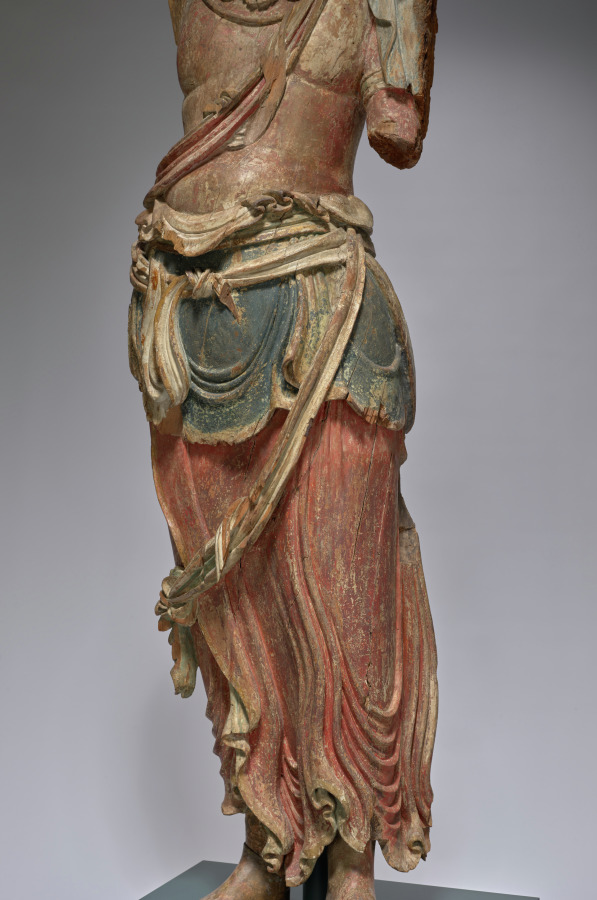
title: Eleven-Headed Guanyin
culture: China, late Northern Song dynasty (960-1127) - Jin dynasty (1115-1234)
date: 1100–1200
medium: wood with polychromy and cut gold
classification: Sculpture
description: The bodhisattva is an enlightened being dedicated to the spiritual awakening of all beings. The compassionate bodhisattva Guanyin, in a variety of manifestations, is probably the most popular deity of worship in Chinese Buddhism. In the Esoteric Buddhist form shown here, this standing Guanyin has a total of eleven heads, with smaller ones above the principal head. The uppermost head represents the Buddha Amitabha, to whom he is closely related. The eleven heads symbolize the Buddha’s steps on the path to enlightenment.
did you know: This Guanyin is carved from a single block of willow (genus Salix sp.).